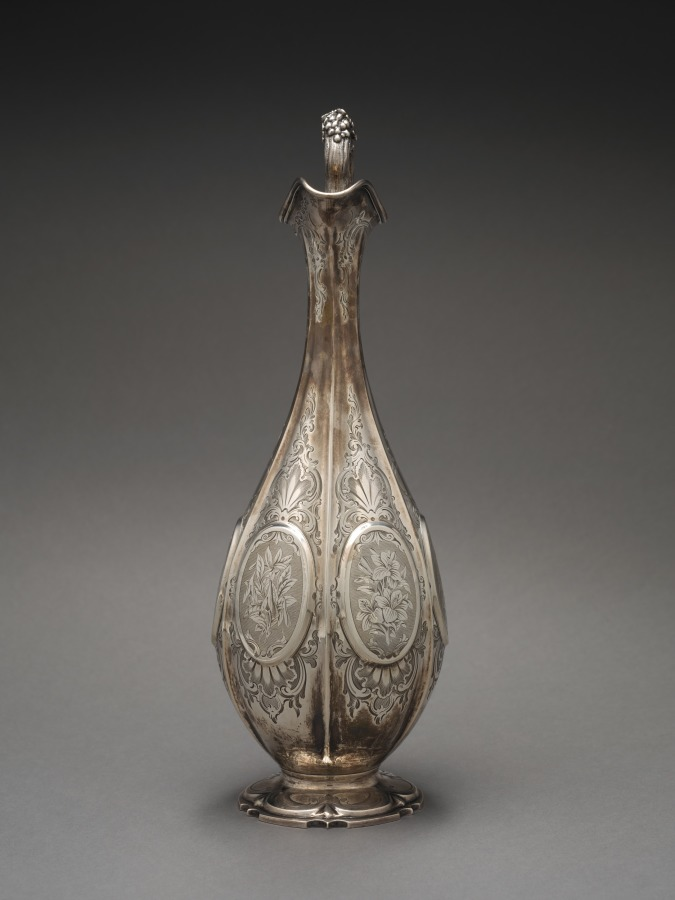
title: Pitcher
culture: England, 19th century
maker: Edward Barnard & Sons (British, c. 1680–2003)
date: c. 1870–80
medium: silver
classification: Silver